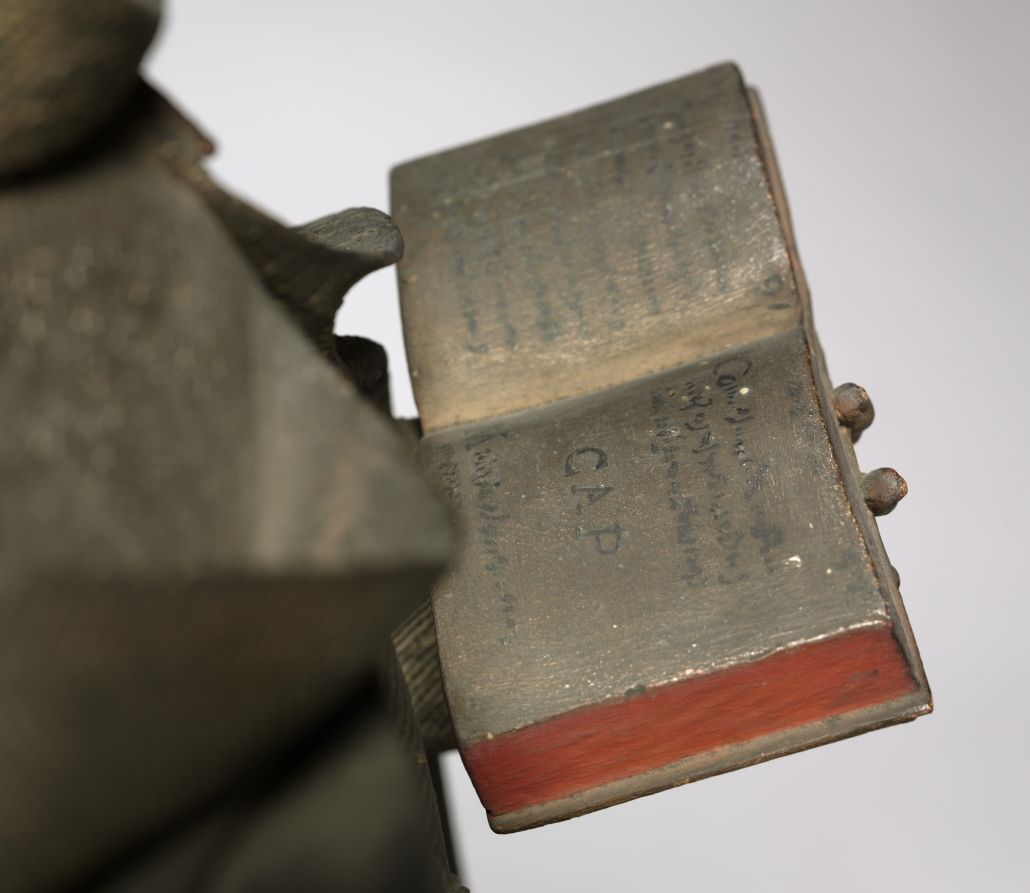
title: Saint Peter of Alcántara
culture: Spain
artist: Pedro de Mena (Spanish, 1628–1688)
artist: and Workshop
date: c. 1663–70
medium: painted wood, with ivory and glass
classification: Sculpture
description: Painted wood sculpture from Spain in the 1600s involved a team of artisans working under a lead sculptor. The sculptor first carved numerous pieces of wood in complex forms. So the paint would stick properly, these fragments were delicately covered in gesso (a combination of white chalk and glue made from animal collagen), preserving the subtle woodcarving underneath. The rough surface of the saint's face—reflecting his age and hardships—came from texturing the gesso with a brush. The glass eyes, probably imported from Venice, were inserted from behind the face before the wood pieces were attached. Finally, the eyelashes were added for a further touch of realism. A painter created the appearance of coarse sackcloth in a distinctive style, with yellow strokes rising off the surface. Smoother brushstrokes form the flesh tones, even revealing the saint's five-o'clock shadow. Unlike other kinds of painting, sculpture from southern Spain at this time was usually not covered in varnish; sculptors prized the unvarnished paint for its realistic effect, although it makes the surface exceptionally delicate and susceptible to dust and dirt, which more easily sticks to the surface.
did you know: Peter of Alcantara was so dedicated to his work he slept only 90 minutes a night--he's the patron saint of night watchmen!